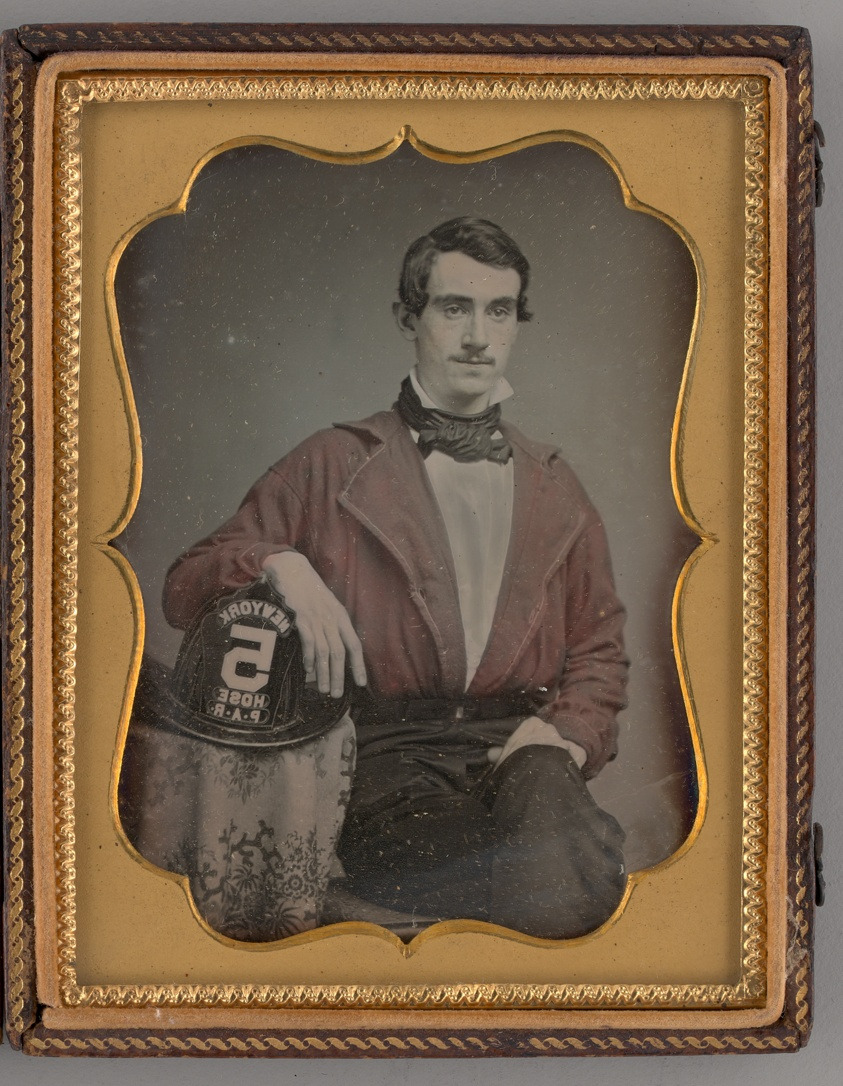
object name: Photograph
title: Untitled (Portrait of a Seated Man)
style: 19th century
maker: Unknown maker; American, 19th century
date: 1857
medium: Daguerreotype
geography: United States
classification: portrait; daguerreotype; portrait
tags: lundberg collection, Male, people, portraits, portraits: male subject